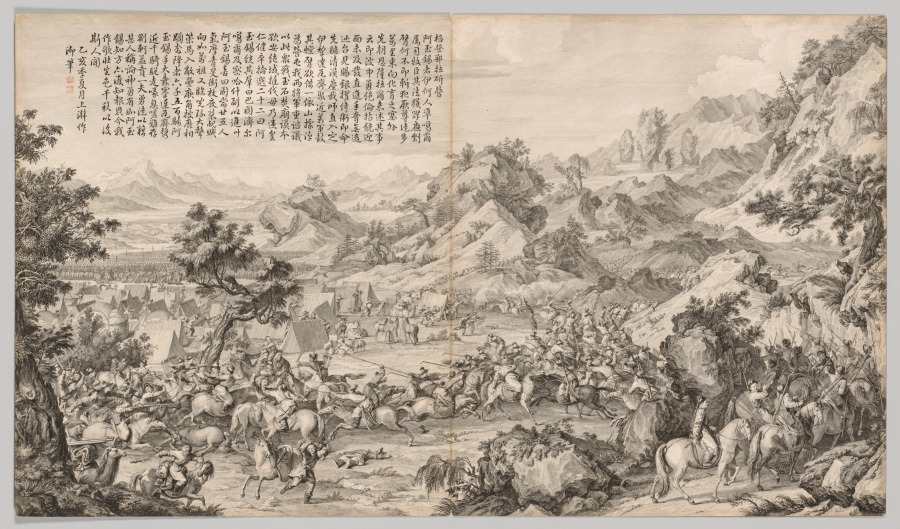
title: Attacking the Camp at Gatan Ola: from Battle Scenes of the Quelling of Rebellions in the Western Region, with Imperial Poems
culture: China, Qing dynasty (1644–1911), Qianlong reign (1736–95)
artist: Giuseppe Castiglione (Italian, 1688–1766)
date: c. 1765–74; poem dated 1755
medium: etching, mounted in album form, 16 leaves plus two additional leaves of inscriptions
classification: Print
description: This set of etchings was commissioned by Emperor Qianlong to record in pictorial terms the courage of his generals and soldiers in quelling the rebellions in the Western Regions. Qianlong added his own poem to each of the etchings, indicating his appreciation and pride in this demonstration of military might. "Western Regions" refers to the present-day Xingjiang province, often described in Western writing as "Central Asia."